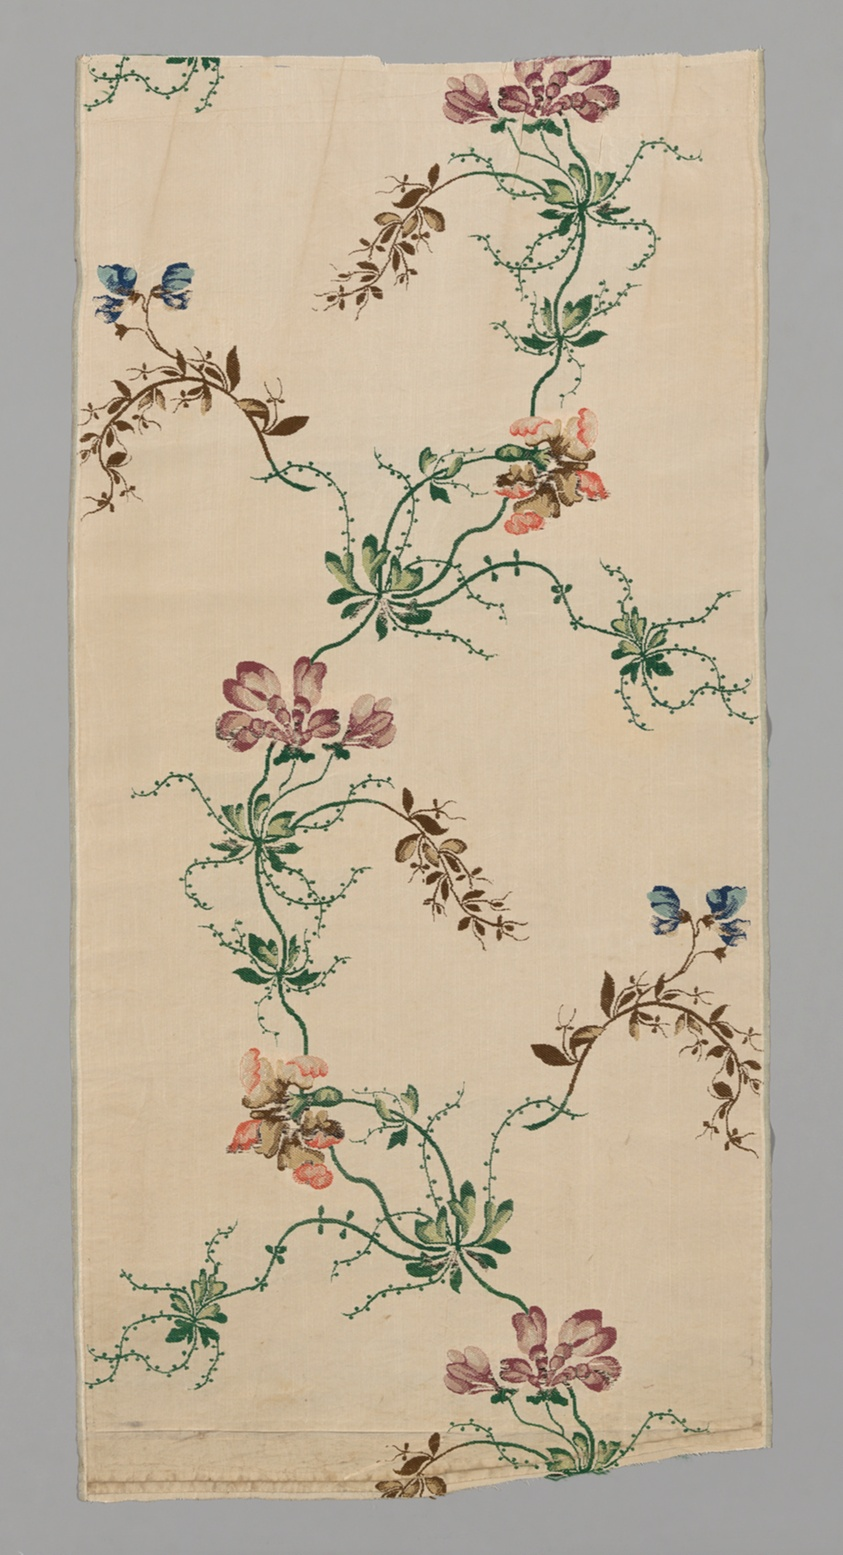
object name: Costume and Accessories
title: Panel from a Skirt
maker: Possibly designed by Anna Maria Garthwaite; English, 1720–1756; England, Spitalfields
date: 1741/42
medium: Silk, plain weave with weft-float faced 2:1 twill interlacings of secondary binding warps and brocading wefts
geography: England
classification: textile; weaving; costume